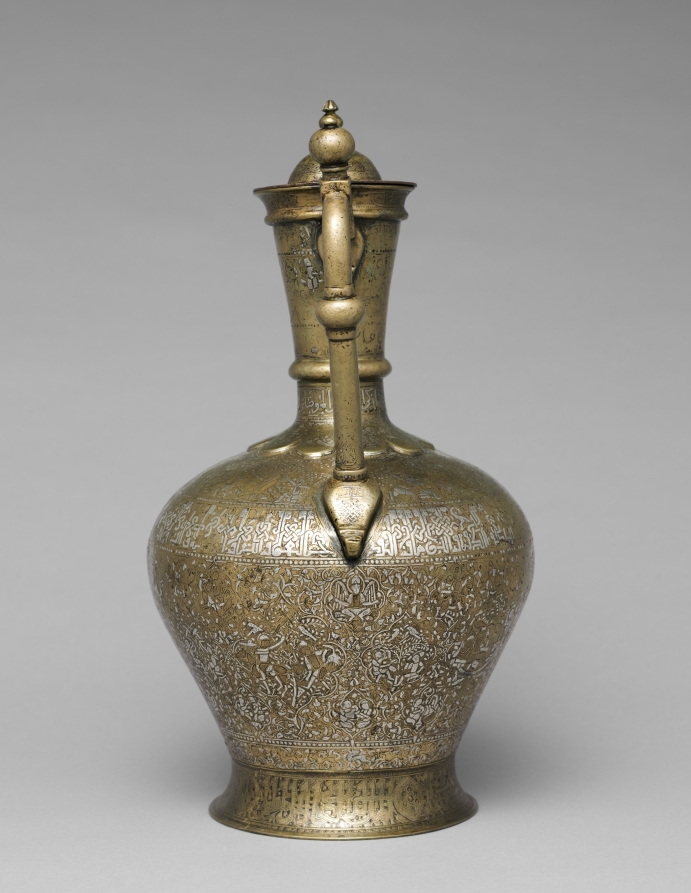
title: Luxury Ewer Extending Good Fortune to the Owner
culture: Iraq, possibly Mosul, Zangid or Artugid Period, 13th Century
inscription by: Ahmad al-Dhaki al-Mawsili (Iraqi, Mosul, active early 1200s?)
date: 1223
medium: brass inlaid with silver; lid and base added later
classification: Metalwork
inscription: Band on the neck (naskh): "Work of Ahmad al-Thaki, the engraver, al-Mawsili, in the year 620 and glory to my owner"; band at the base of the handle (naskh): "Work of Ahmad al-Thaki al-Mawsili"; graffiti of later owners, roughly scratched into the neck of the ewer: "Husayn ibn Qasim"; "Usta al-Muhtasib [?]"; band on the shoulder of the ewer (plaited, animated kufic): "Good luck, and learning, and commanding respect, and prosperity, and pride, and generosity, and faithfulness, and affection, and glory, and survival, and justice, and blessings, and exaltedness, and prosperity, and everlasting peace, and charitable giving."; band on the foot (naskh) [foot is a later addition]; this inscription has not yet been deciphered.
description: This silver inlaid ewer was produced for luxury clientele. The wide band around the body of the vessel displays vignettes of daily and courtly life contained within multilobed medallions. Some of the scenes feature falconry, hunting, dancing, and several groups of musicians. All these scenes are set off against a skillfully executed arabesque background—a pervasive motif in Islamic art characterized by interwoven vegetal and curvilinear elements. An inscription around the ewer’s shoulder extends good fortune, prosperity, and peace to the owner. The ewer is dated 1223 and signed by the master craftsman Ahmad al-Dhaki of Mosul.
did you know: Later owners roughly scratched their names into the neck of the ewer.